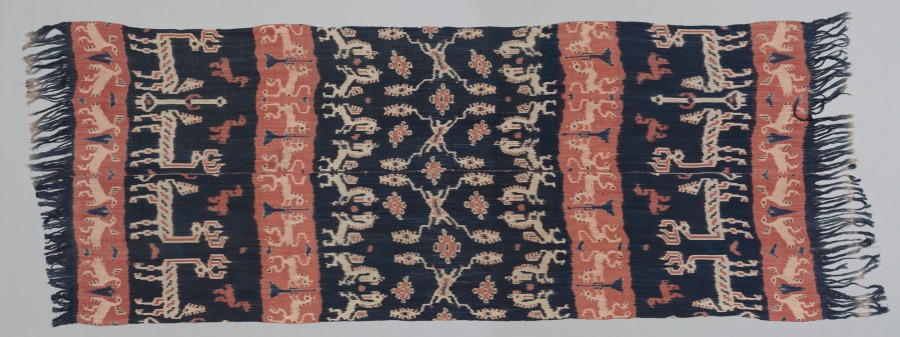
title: Hinggi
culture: Indonesia, Sumba, late 19th century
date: late 1800s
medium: cotton, ikat dyed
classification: Textile